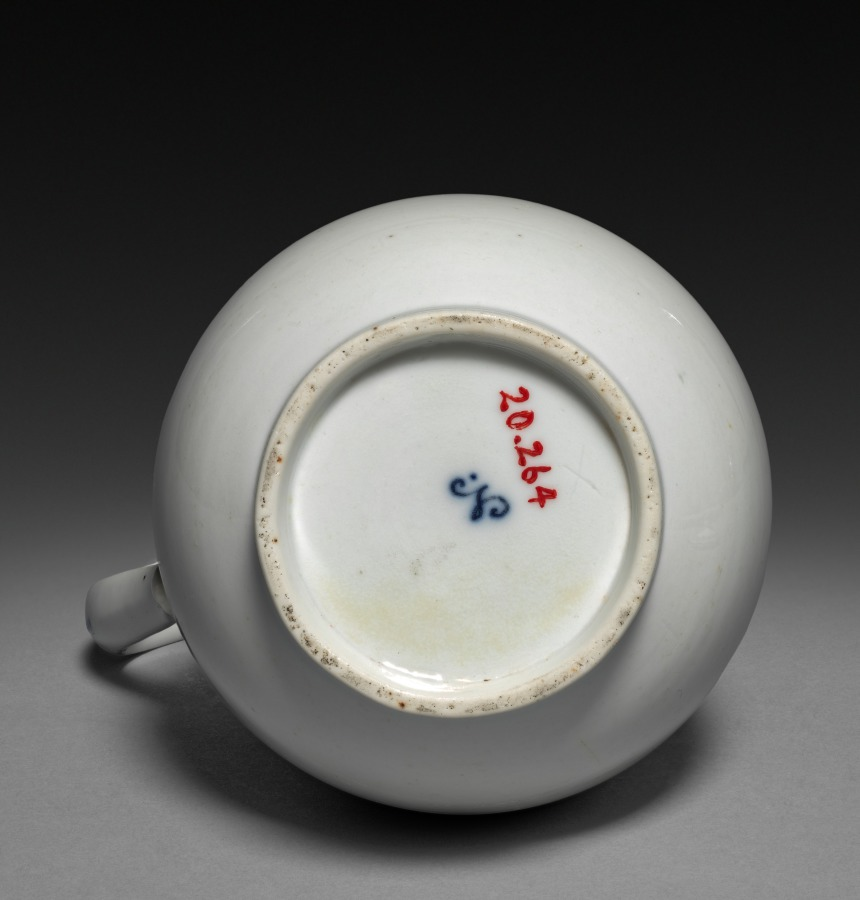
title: Pitcher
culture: France, 18th century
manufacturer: Niderviller Factory (French)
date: c. 1780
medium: hard-paste porcelain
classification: Ceramic